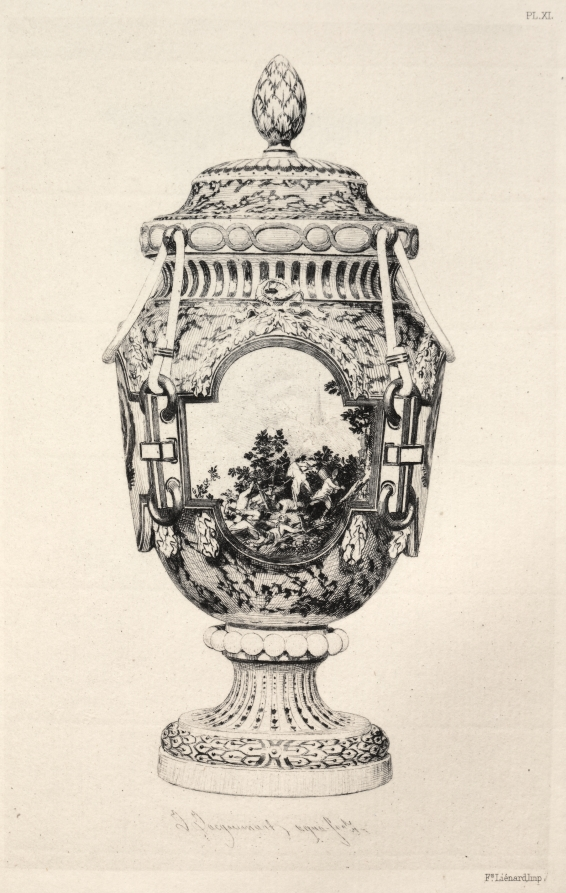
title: History of the Ceramic Art: A Descriptive and Philosophical Study of the Pottery of All Ages and All Nations: France: Sèvres- Soft Porcelain- Vase, Commemorative of the Battle of Fontenoy (Plate XI)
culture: France, 19th century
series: Book by Albert Jacquemart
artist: Jules Jacquemart (French, 1837–1880)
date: 1877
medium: etching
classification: Bound Volume